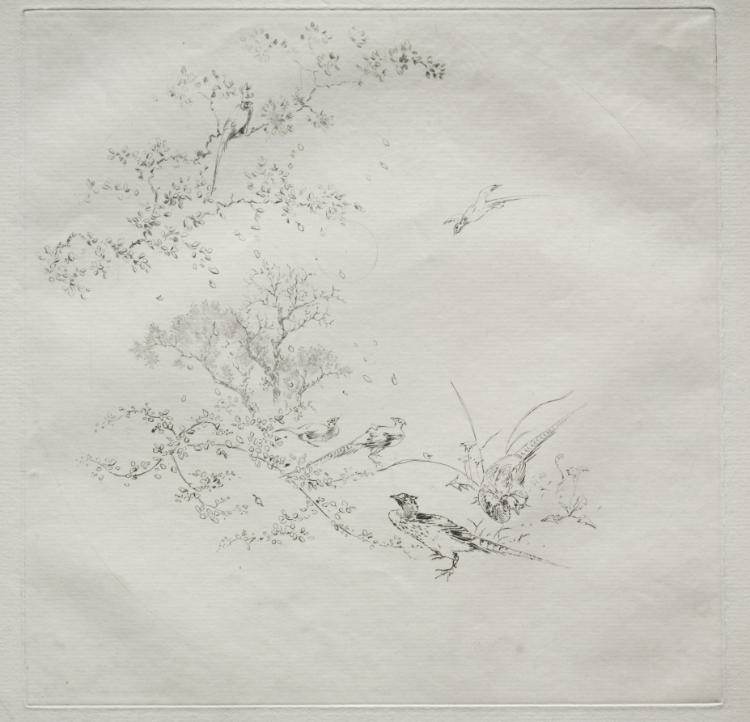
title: Parisian Service (Haviland service): Fog (no. 1)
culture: France, 19th century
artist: Félix Bracquemond (French, 1833–1914)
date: 1875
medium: etching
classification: Print